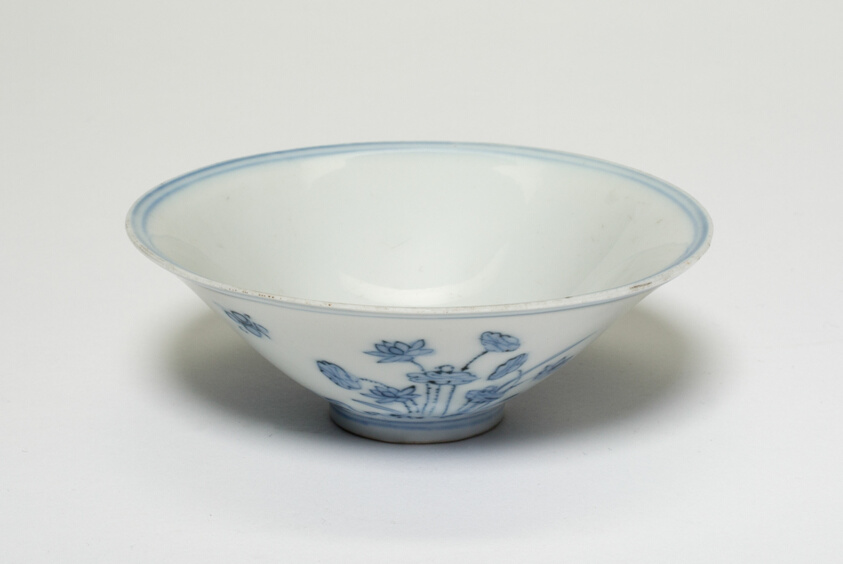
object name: Vessel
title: Conical Bowl with Lotus Flowers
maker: China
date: Ming dynasty (1368 –1644), Xuande reign mark and period (1425–1435)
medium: Porcelain painted in underglaze blue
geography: China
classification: porcelain; asian art; ceramics